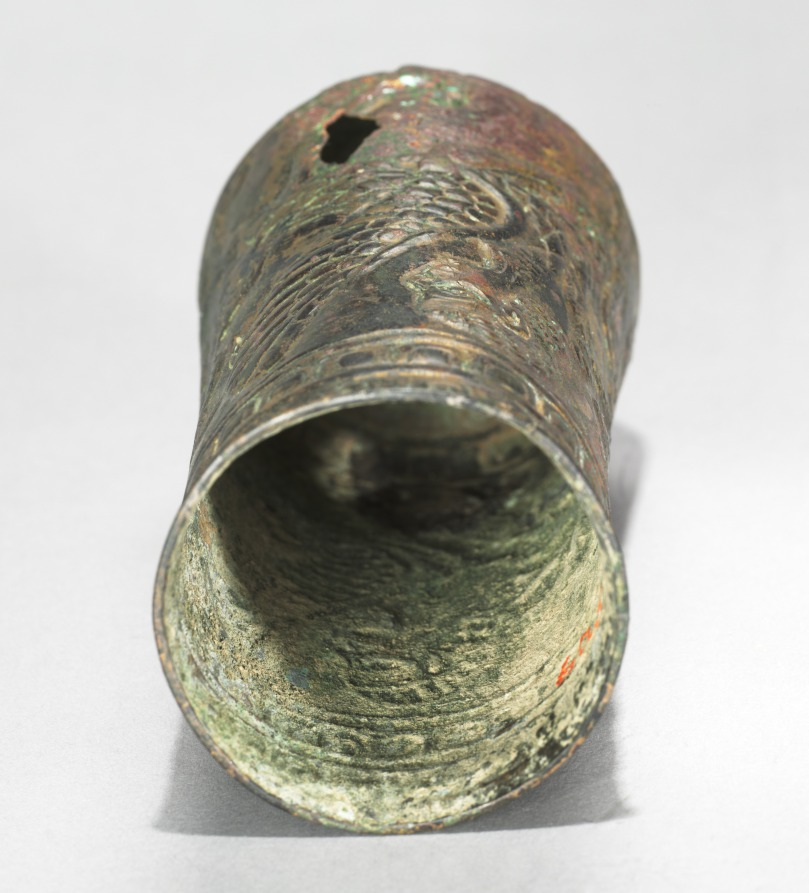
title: Button-Based Situla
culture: Iran, Luristan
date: 900–700 BCE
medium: bronze, repoussé, punched, incised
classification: Metalwork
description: The metalworkers of Luristan provided the Assyrian empire with elaborate bronze ornaments and vessels. These two situla are decorated symmetrically---one with ibexes drinking from an overflowing water jar; the other, with sphinxes.